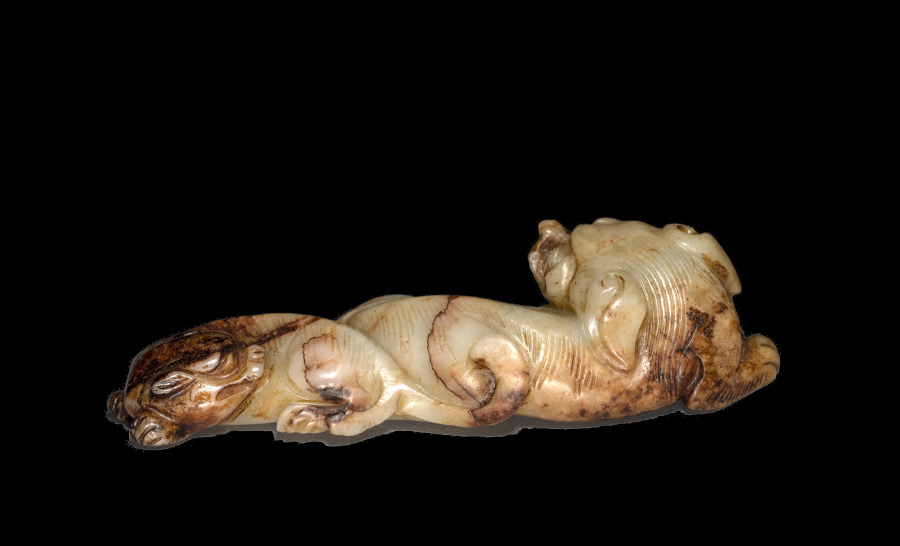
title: Reclining Dog and Puppy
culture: China, Yuan dynasty (1271-1368)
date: 1271–1368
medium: jade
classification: Jade